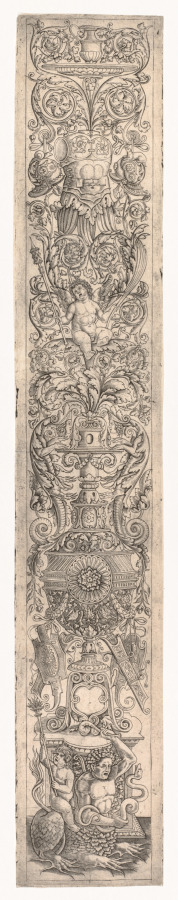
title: Ornamental Panel: Triton Ridden by a Child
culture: Italy, 15th century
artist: Giovanni Pietro da Birago (Italian, active c. 1471–1513)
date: c. 1505–15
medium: engraving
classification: Print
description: Printed ornamental columns—such as these flanking the portrait of Henry II—were probably colored and used for interior decorations. The printed panels may have also served artists and craftsmen creating similar patterns in other materials, including wood, stone, or metal. They have been imaginatively integrated into the display on this wall because their intricate designs feature pieces of armor and mythical creatures that echo those in the works around them.